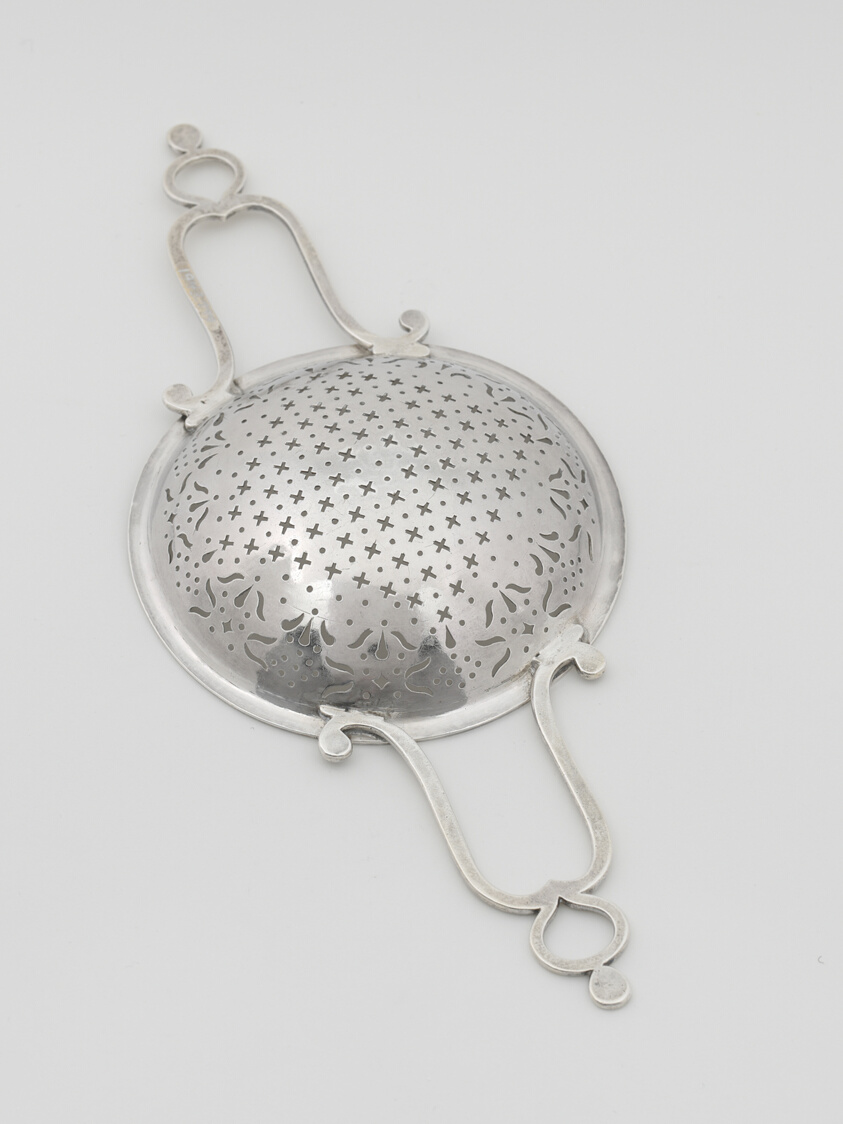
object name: Metalwork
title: Punch Strainer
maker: William Simpkins; American, 1704–1780; Boston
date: 1743–60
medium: Silver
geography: Boston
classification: utensil for serving food; utensil; silver; american decorative arts; american arts; decorative arts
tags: dining, drinking